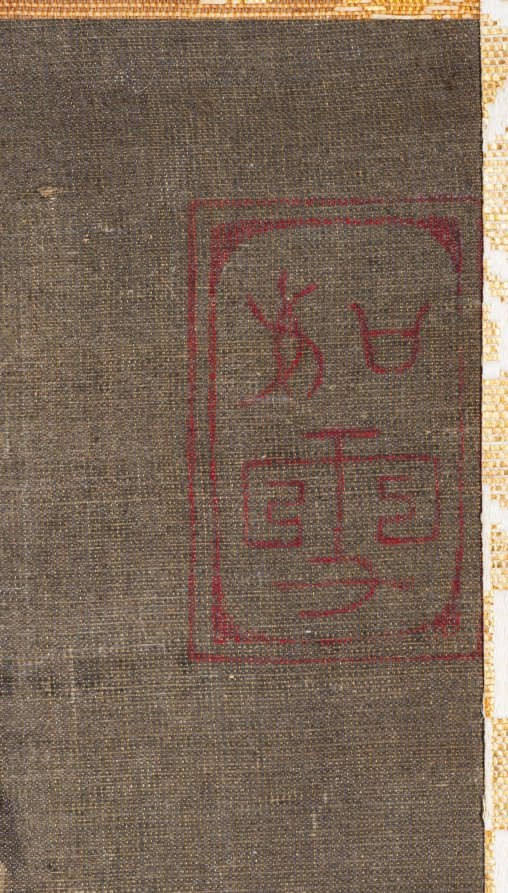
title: Winter Landscape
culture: Korea, Joseon dynasty (1392–1910)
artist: Yeoseol (Korean)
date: 1500s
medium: hanging scroll; ink and slight color on silk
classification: Painting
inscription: seal reading Nyosetsu in upper right corner.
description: This wintry vista is a vivid example of idealistic monumental painting: the strong contrasts of ink washes and contouring brush lines; the bold outlining of rock shapes and tree trunks; and the many short, twisting brushstrokes that build up the surfaces of the rocks. Much of the painting’s appeal can be attributed to the dynamic lines and contrasting tonal patterns that lead the viewer’s eye from the lower foreground toward the cold mountain peaks in the distance. In the corner is a seal that reads "Yeoseol," meaning "Snow-Like."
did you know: This wintry scenery was mainly painted in monochrome ink, but some details like the rider's horse saddle and the servant's carrier attest the use of light blue pigment.